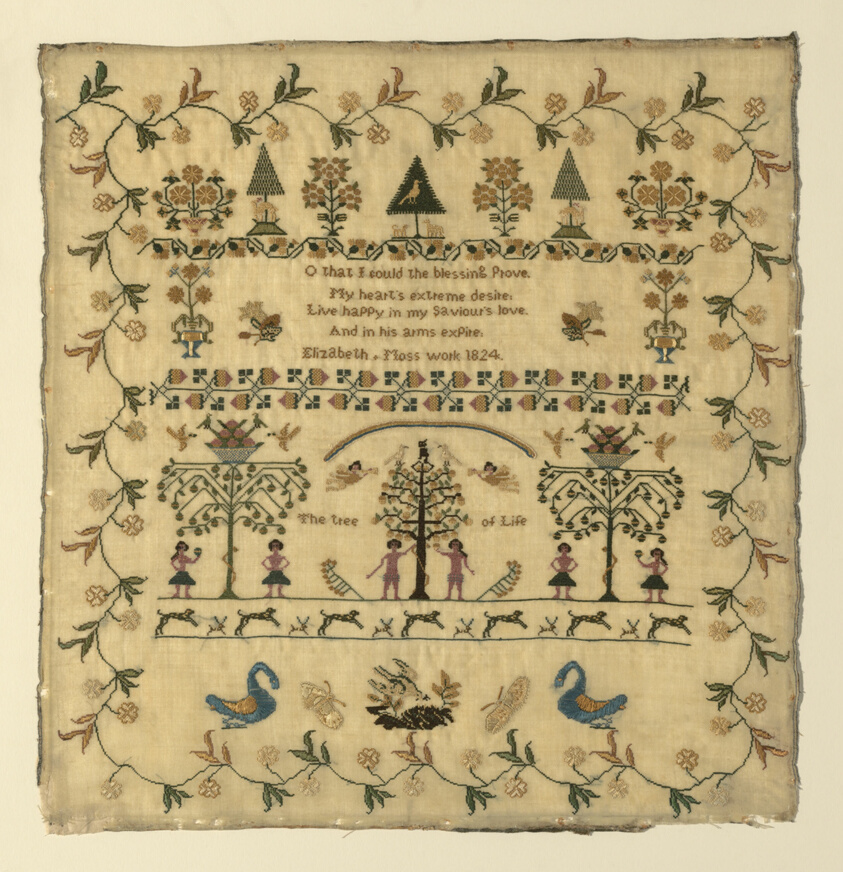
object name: Textile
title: Sampler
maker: Elizabeth Moss (active c. 1824); United States or England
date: 1824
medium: Linen and silk; Tabby weave, embroidered in silk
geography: United States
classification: textile; needlework (visual works); sampler